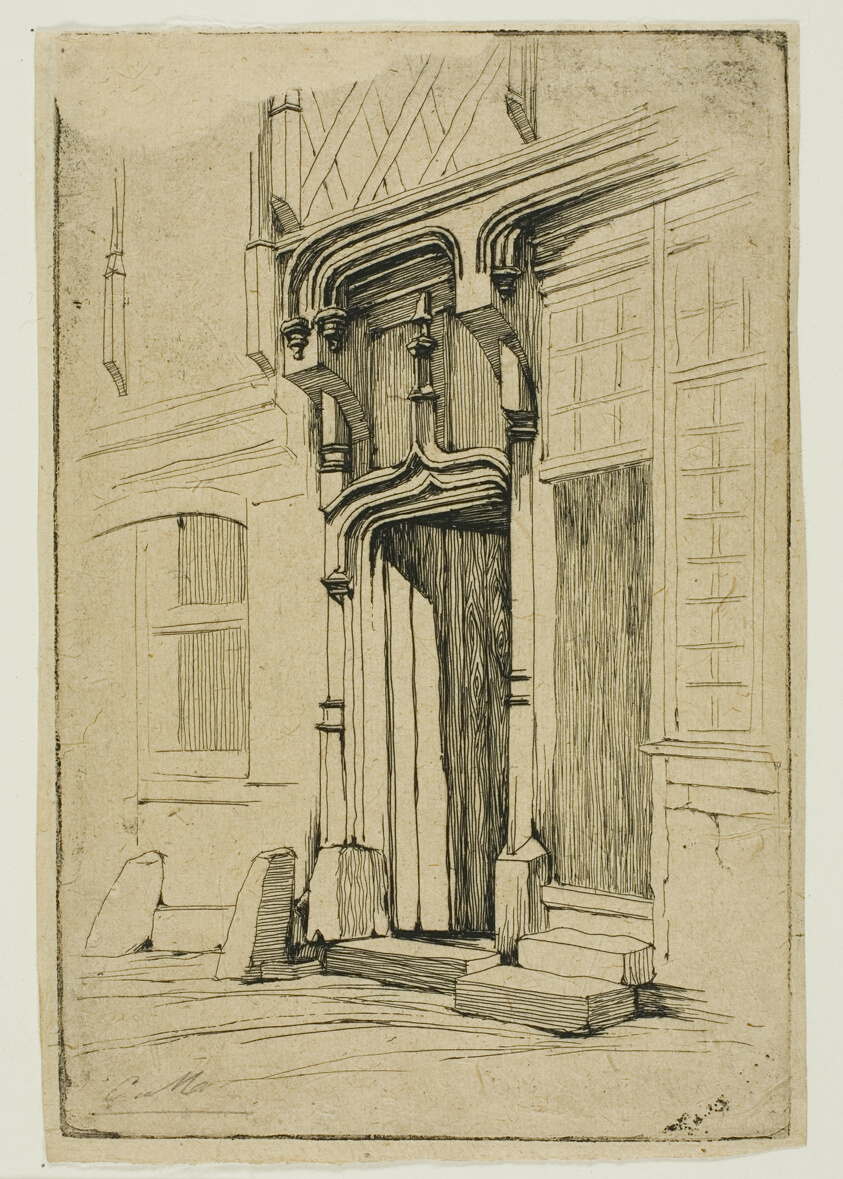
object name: Print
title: Doorway of an Ancient Convent, in the rue Mirabeau, Bourges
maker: Charles Meryon (French, 1821-1868)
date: 1851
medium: Etching on tan wove paper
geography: France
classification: etching; print; prints and drawing